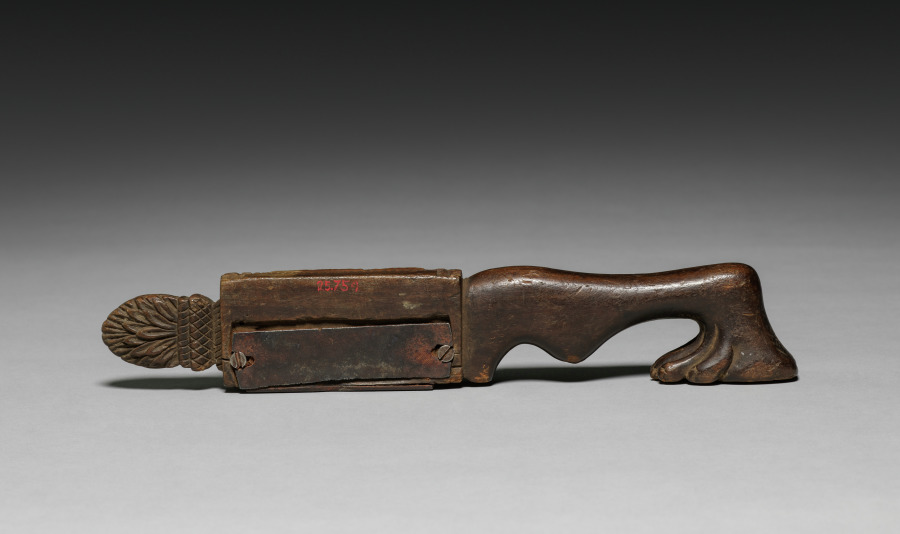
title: Scraper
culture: France or Italy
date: 1600s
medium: wood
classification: Tool